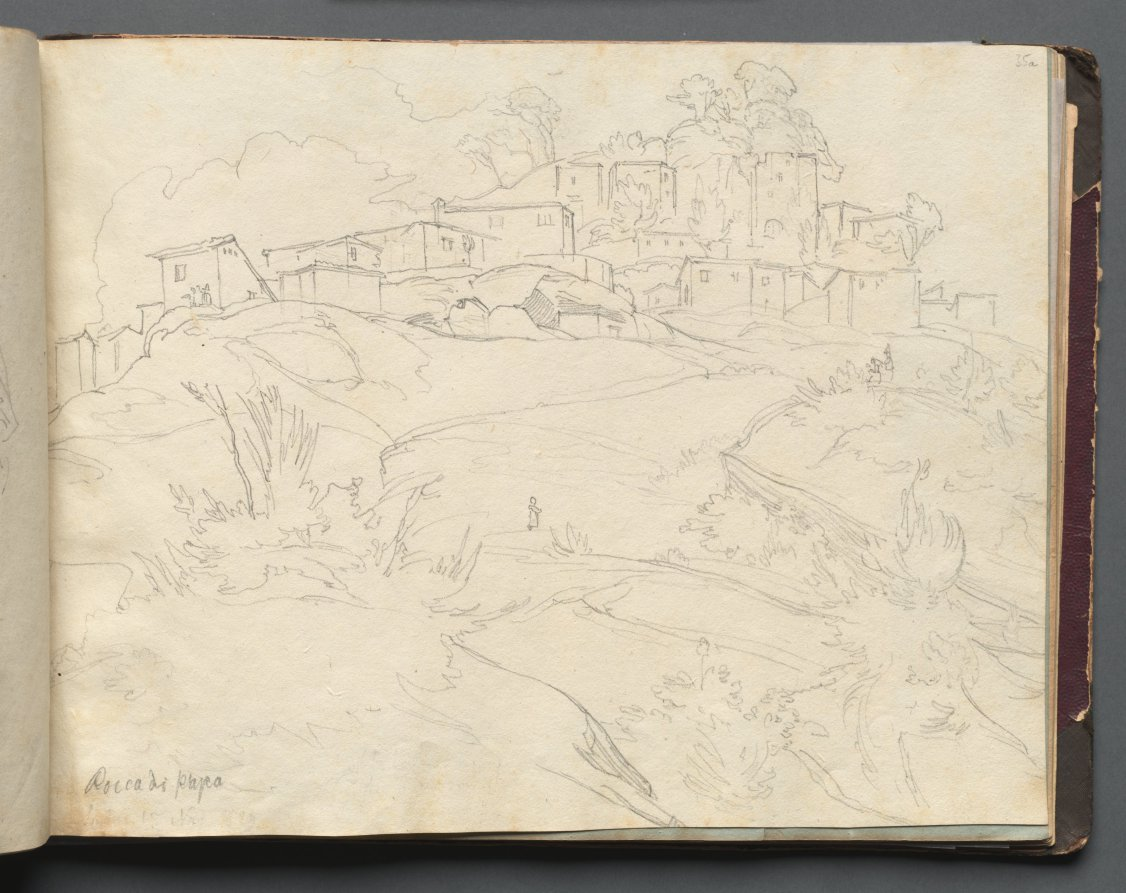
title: Album with Views of Rome and Surroundings, Landscape Studies, page 35a: "Rocca di Papa"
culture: Germany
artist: Franz Johann Heinrich Nadorp (German, 1794–1876)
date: c. 1830s-70s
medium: graphite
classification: Bound Volume